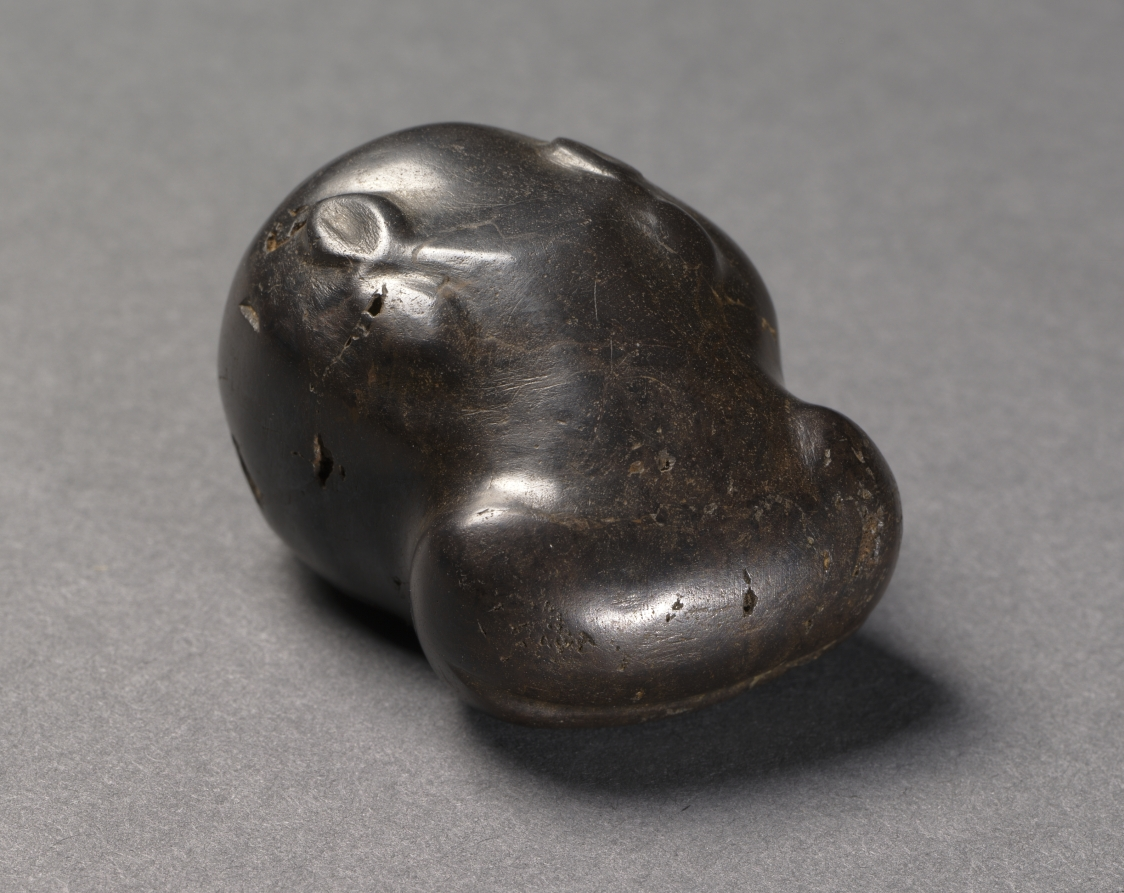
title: Weight in the Form of a Hippopotamus Head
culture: Egypt, New Kingdom (1540–1069 BCE), Dynasty 18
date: c. 1540–1296 BCE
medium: hematite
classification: Implements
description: Sensuously carved and polished to a silky luster, this weight takes the form of a hippopotamus head. Eyes, ears, and nostrils ae modeled in relief; the mouth is closed. The flat underside provides a surface on which to rest the object. This hippo head weighs 62.1 grams, roughly three-quarters of a deben, a unit of weight in ancient Egypt. As such it does not correspond to any of the more usual subdivisions of the deben, although similar examples are known. In fact it is an inter-standard weight, representing eight seniu or two-thirds of a deben, and is equivalent of an Aegean unit of 62.1 grams.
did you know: The word hippopotamus comes from the ancient Greek for "river horse" (ἱπποπόταμος).